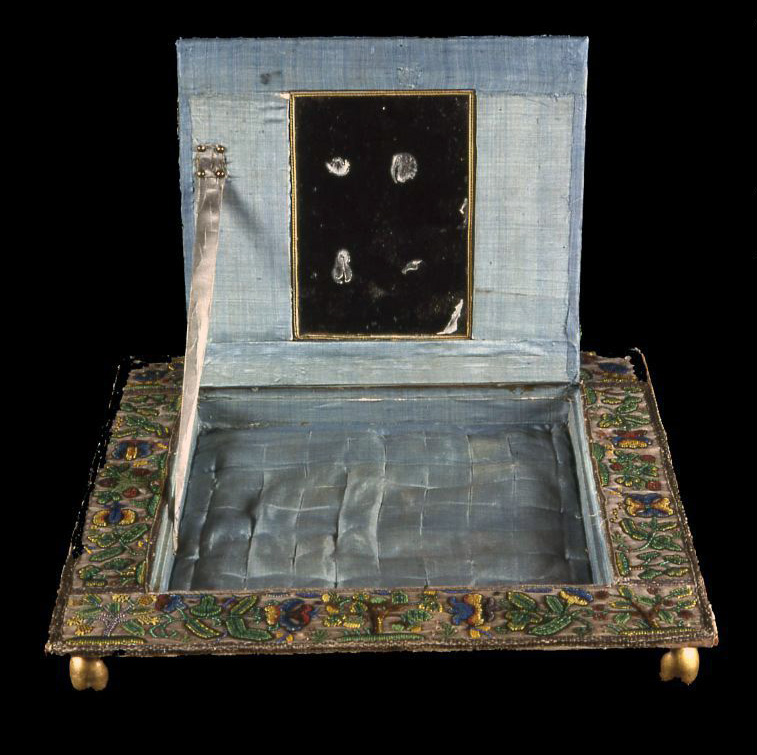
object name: Textile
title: Box (Needlework)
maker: England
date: c. 1670s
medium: Silk, warp-float faced 7:1 satin weave; embroidered with silk and gilt-metal strips in couching; beaded with glass beads; edged with silk and gilt-metal-strip-wrapped silk, plain weave; wooden frame covered with paper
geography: England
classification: textile; needlework (visual works)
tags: people, floral arrangements, flowers